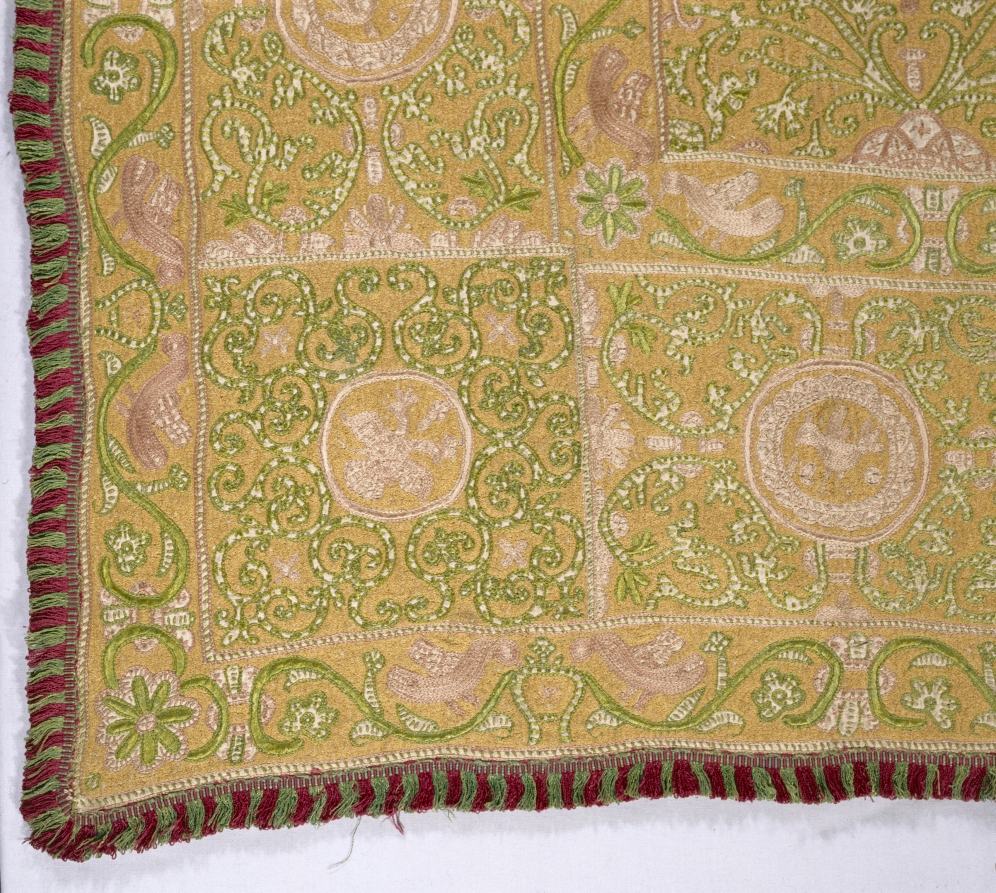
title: Embroidered Bedspread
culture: Portugal, 17th-18th century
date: 17th-18th century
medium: embroidery; silk on linen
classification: Embroidery